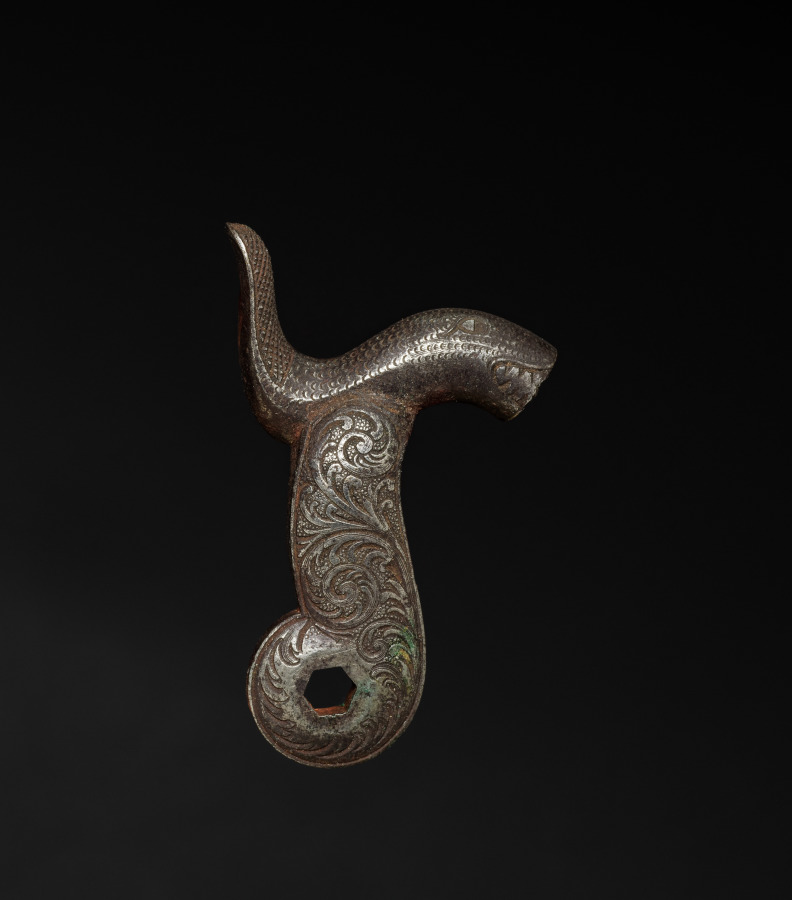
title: Gun-Lock Hammer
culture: England, early 19th century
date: c. 1800–1825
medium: steel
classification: Arms and Armor